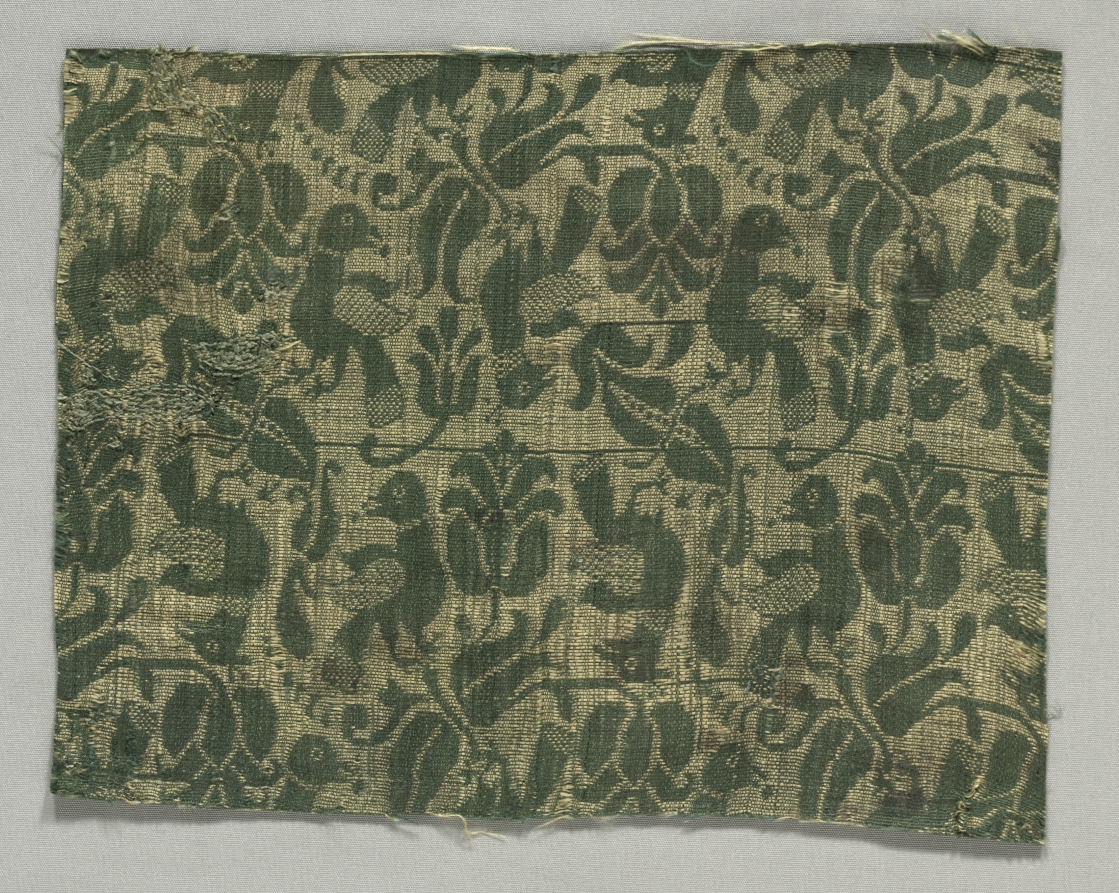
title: Fragment with Birds and Floral Motif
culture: Italy or Spain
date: 1600s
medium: silk: damask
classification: Textile